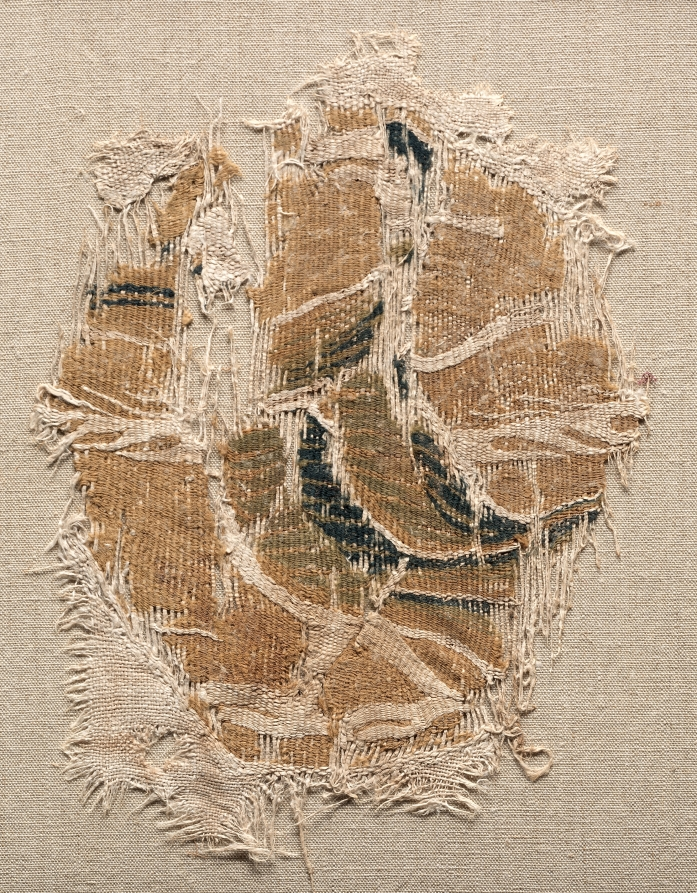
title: Fragments from a Hanging (?)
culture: Egypt, late Abbasid - early Tulunid period, 9th - 10th century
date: 800s - 900s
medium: tabby weave with inwoven tapestry ornament, linen and wool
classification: Textile